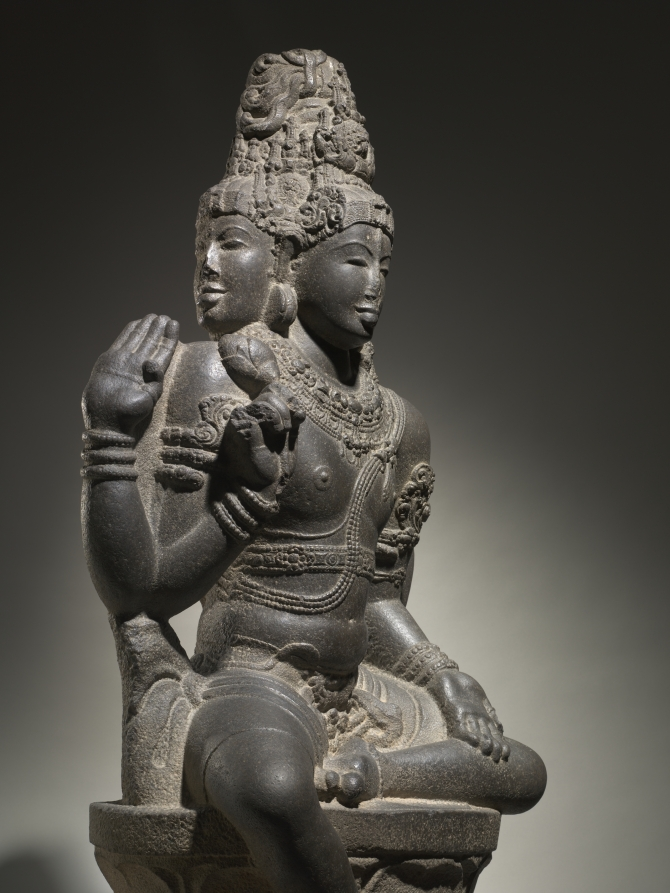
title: Brahma-Shiva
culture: South India, Tamil Nadu, Chola dynasty, late 10th - early 11th century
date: late 900s–1000s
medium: granite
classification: Sculpture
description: In the Hindu pantheon Brahma is in charge of carrying out the work of creation. In this tour-de-force of South Indian temple sculpture, he is in a special regal aspect, with the only elements of his typical priestly appearance being the prayer beads and the matted dreadlocks piled on his head. Four arms connote superhuman power, and four heads convey the idea that his creative activities spread in all four directions. His upper right hand enjoins freedom from fear, and the lower holds a lotus bud associated with birth and the process of creation. His lowered left hand is held in the gift-giving gesture, suggestive of the gift of creation he will bestow upon the world.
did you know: The back of the sculpture retains the original textured surface from a pointed chisel, suggesting it was in a niche or near a wall, protected from worshippers’ touches.